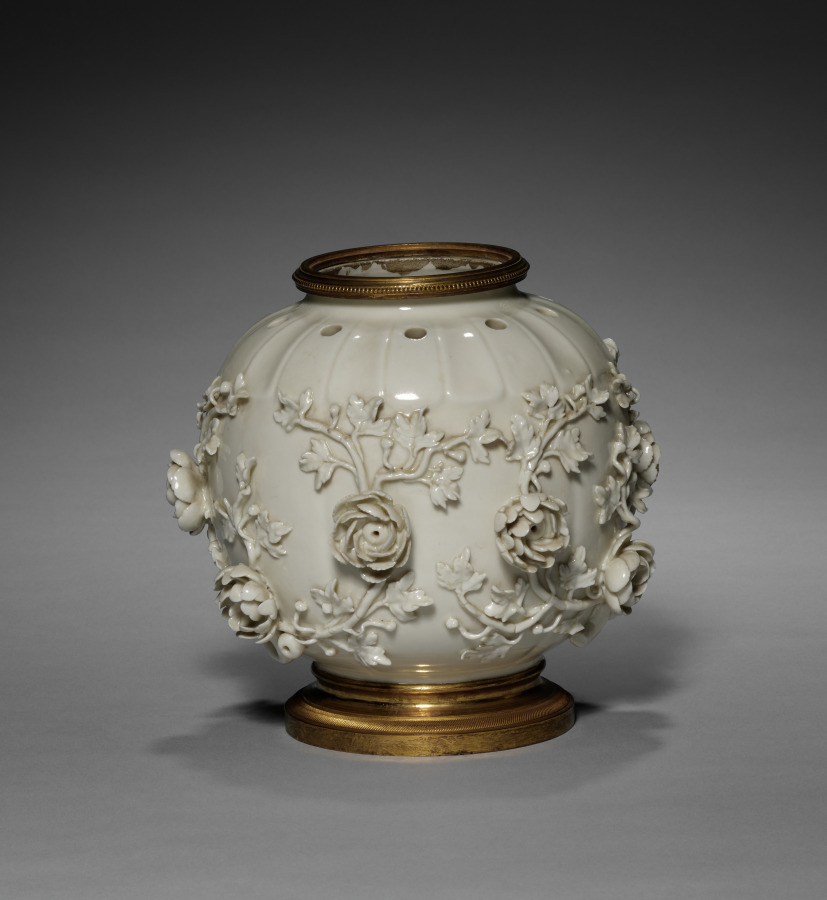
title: Potpourri Vase with Cover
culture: France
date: c. 1860–80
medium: blanc-de-chine porcelain; gilt bronze mount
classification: Ceramic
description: This vase was likely made by the celebrated Parisian ceramics firm of Edmé Samson (1810–91). To cater to the resurgence in taste for 18th-century designs, the Samson firm specialized in making reproductions of rare 18th-century European porcelains, especially those from firms that had already copied Chinese porcelains. In this case, this vase's design is taken from models produced by the Saint-Cloud factory in the 1750s after earlier Qing dynasty Chinese ceramics. However, the telltale sign that this vase is made by Samson and not Saint-Cloud is that the original would have been made from a soft-paste porcelain (fired at a lower temperature), while this example is made of hard-paste porcelain (fired at the highest temperature).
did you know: Potpourri vases always have holes in the top to let the scent of dried spices and flowers contained within freshen the air around them.